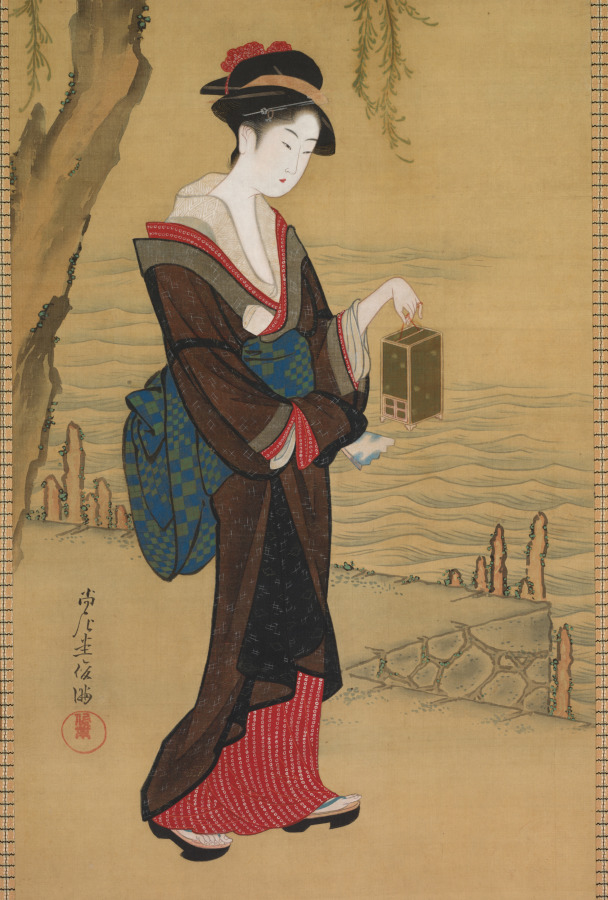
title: Beauty with Fireflies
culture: Japan, Edo period (1615–1868)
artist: copy after Kubo Shunman (Japanese, 1757–1820)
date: early 1800s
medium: Hanging scroll; ink and color on silk (ivory roller ends)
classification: Painting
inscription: Signed at lower left: 尚左堂俊満 Shōsadō Shunman Sealed at lower left: round red seal：俊満 Shunman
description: A young woman has passed beneath an aged willow tree as she strolls along a riverbank carrying a cage full of fireflies. The painting is a copy after Kubo Shunman, best known as a composer of witty verses in 31-syllables (kyōka) and designer of limited edition prints called surimono. Shunman was active during the mature era of ukiyo-e production, and his more formal paintings most often took as their subjects beautiful Chinese or Japanese women. Here, his imitator commemorates one of summer's most delightful evening pastimes, the observation of the flickering lights of the firefly. The woman is presented in a ubiquitous summer setting, a refreshingly cool and breezy riverbank in earshot of rustling willow leaves.